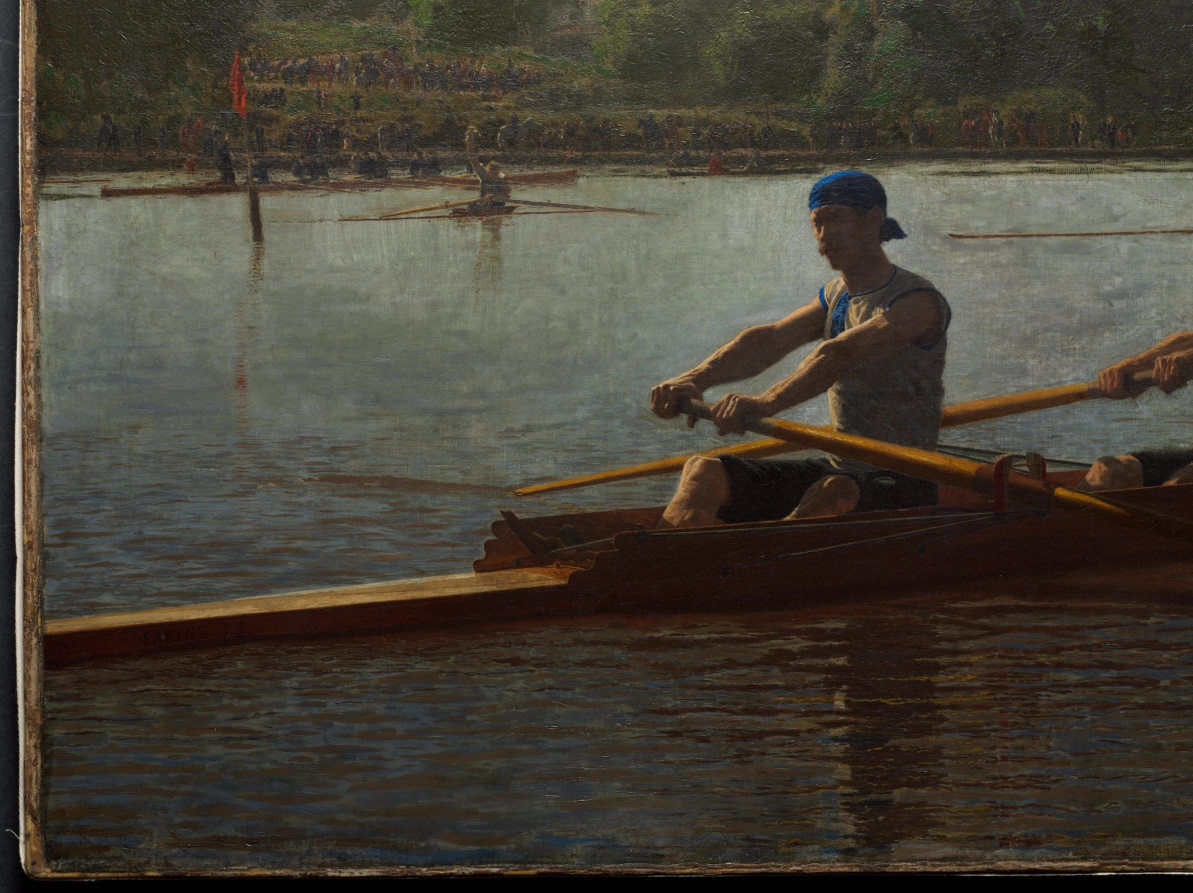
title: The Biglin Brothers Turning the Stake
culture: America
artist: Thomas Eakins (American, 1844–1916)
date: 1873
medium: oil on canvas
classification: Painting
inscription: signed lower left: EAKINS 73.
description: Eakins's painting celebrates athletic teamwork while commemorating an actual event, a famous rowing race that took place on the Schuylkill River in Philadelphia during May 1872. Throngs of spectators line the riverbank and watch as Barney and John Biglin negotiate the tricky turn around a stake marking the halfway point in the contest. Their competitors, seen in the middle distance at the right, lag behind. The Biglin brothers won the race, cementing their status as the most celebrated oarsmen of the era. Trained in the United States and France, Eakins spent almost his entire artistic career in his hometown of Philadelphia. He is renowned for the unsentimental realism in his paintings, whose compositions he developed through painstakingly prepared figure and perspective drawings.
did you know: Rowing was among the most popular spectator sports in the U.S. during the 1870s.